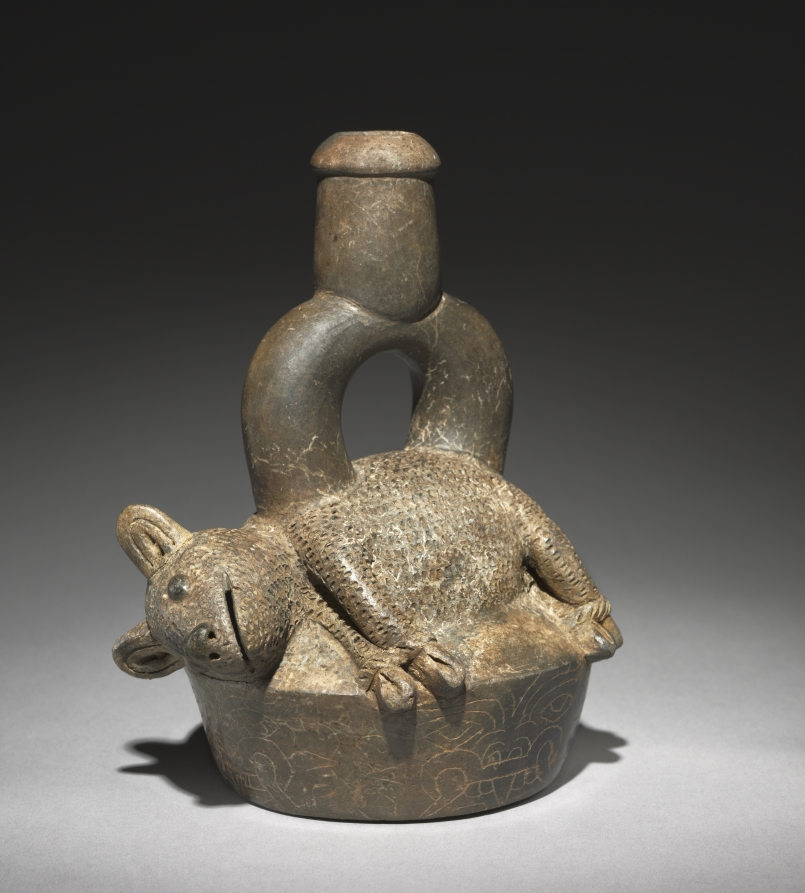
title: Vessel with Pudu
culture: Central Andes, North Coast, Chongoyape, Formative period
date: 500–200 BCE (thermoluminescence date, 1190–90 BCE)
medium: ceramic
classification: Ceramic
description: This bound pudu—a small reddish deer indigenous to the Andes—lies atop a chamber with fanged supernatural heads incised on the sides. The animal may represent a sacrificial offering.